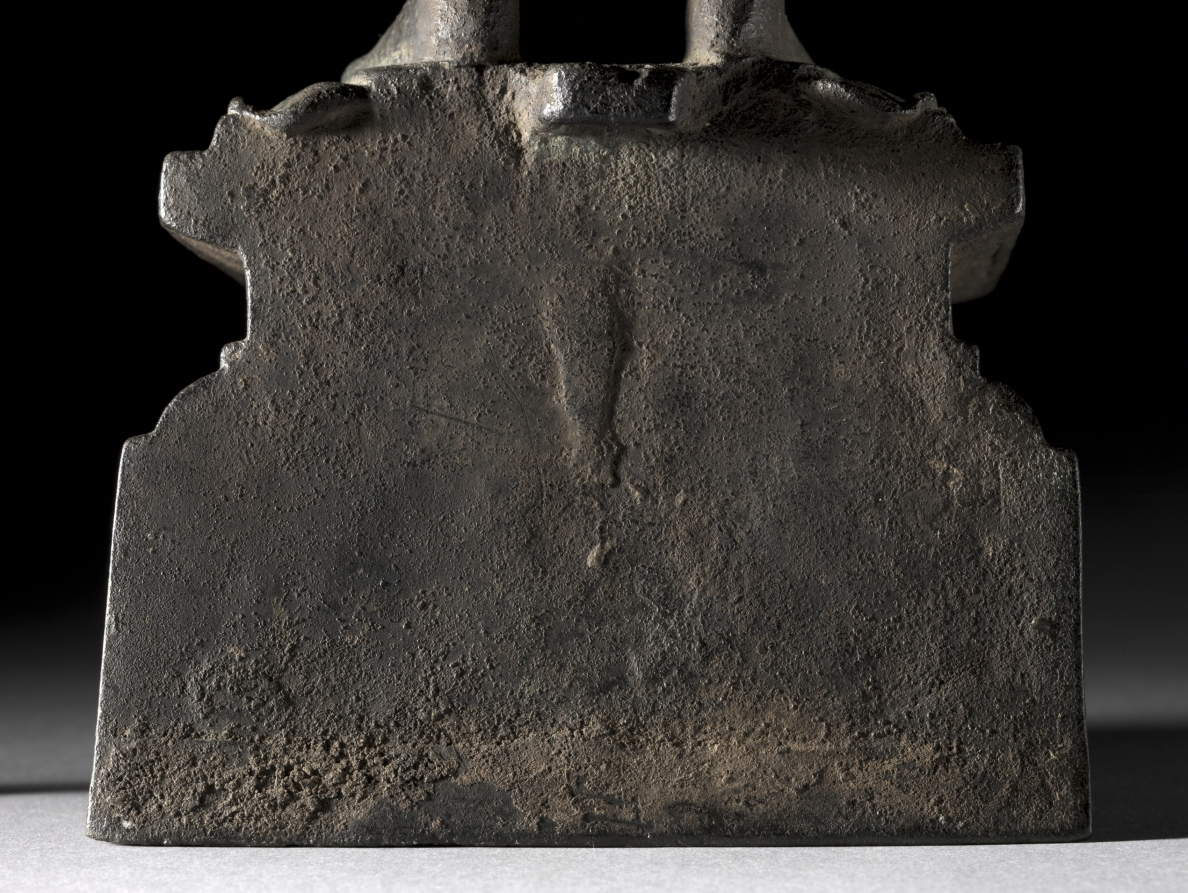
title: Standing Buddha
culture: Northern India, Uttar Pradesh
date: 591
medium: bronze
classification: Sculpture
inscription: 1. ṹ deyadharmmoyaṃ laḍitagrāme yaṃgvalvihāre śā[kya] bhikṣuṇyā 2. pariśuddhamatyā yadattra puṇyaṃ tadbhavatu sarvvasatvānā- 3. manuttarasarvva jñānāvāptaye/ / saṃvat 4a. 500 10 3/ / caityakūta jinabandhuvihārapūrvva-bhuddeśe 4b. piṇḍakena bhojanaṃ karttavya*/ / *Mistake for karttavyam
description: This bronze Buddha is exceptional, because it carries an inscription on its base that dates its manufacture to the year 591. According to the inscription, the sculpture was dedicated by a nun who was from a village in Nepal, but she probably commissioned it at a workshop in northern India. The Buddha's robe on this image has been left plain, without pleat lines to obscure the beauty of the contours of the body. Only the rippling scalloped clusters of the garment’s hem lend some sense of energy and subtle ornament to the composition.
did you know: Around the time when this sculpture was made, portable bronzes began to replace relics as the principal sacred commodity circulating in the Buddhist world.